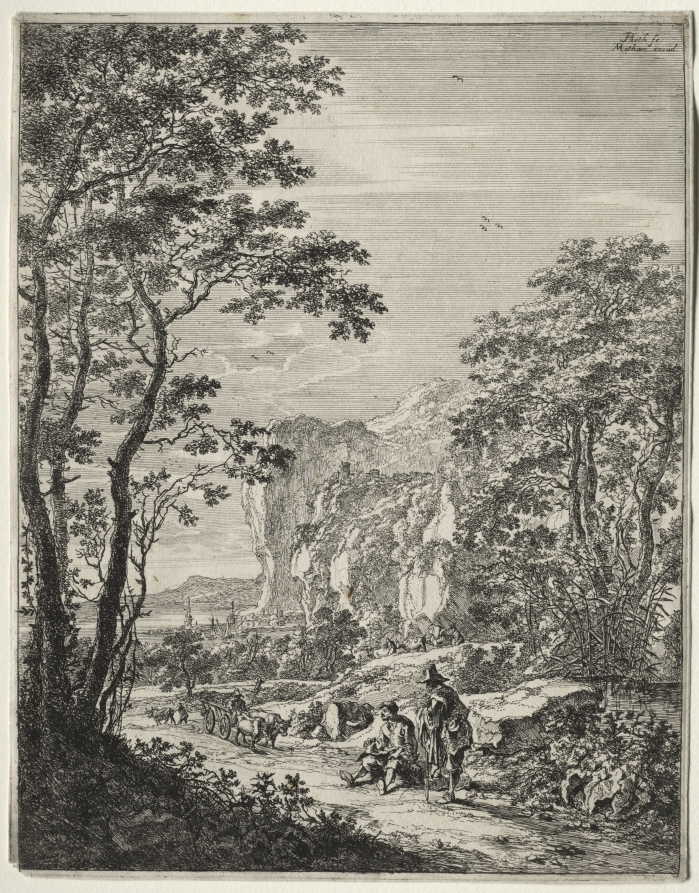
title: Ox-Cart. View between Ancona and Sinigaglia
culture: Netherlands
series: The Upright Italian Landscapes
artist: Jan Both (Dutch, c. 1618–1652)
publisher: Matham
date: 1636–52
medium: etching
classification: Print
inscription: upper right, in plate: Both fe. / Matham excud. ; VERSO, upper center, in graphite: 2 / JB ; lower left, in graphite: MK 27307 ; across bottom, in graphite: Le Chariot attelé de boeufs B. 2. IV ; lower center, in graphite: B. 2 IV ; lower right, in graphite: c. 14424 ; lower right, in graphite: 9